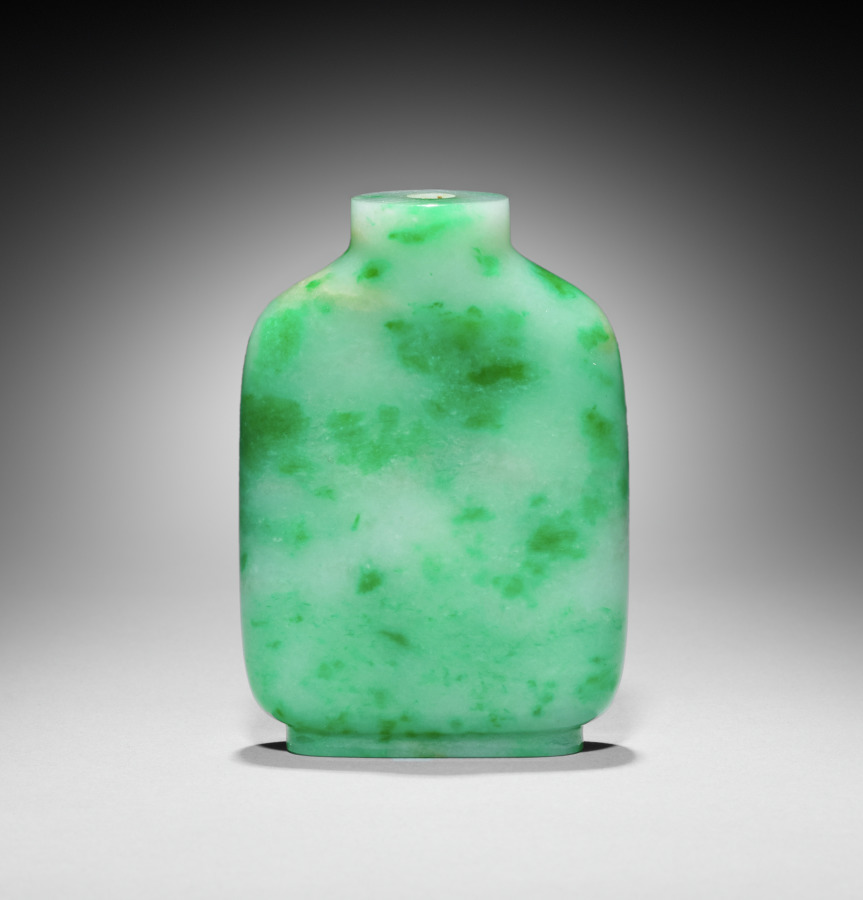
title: Snuff Bottle with Stopper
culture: China, Qing dynasty (1644-1911)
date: 1800s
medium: jade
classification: Jade